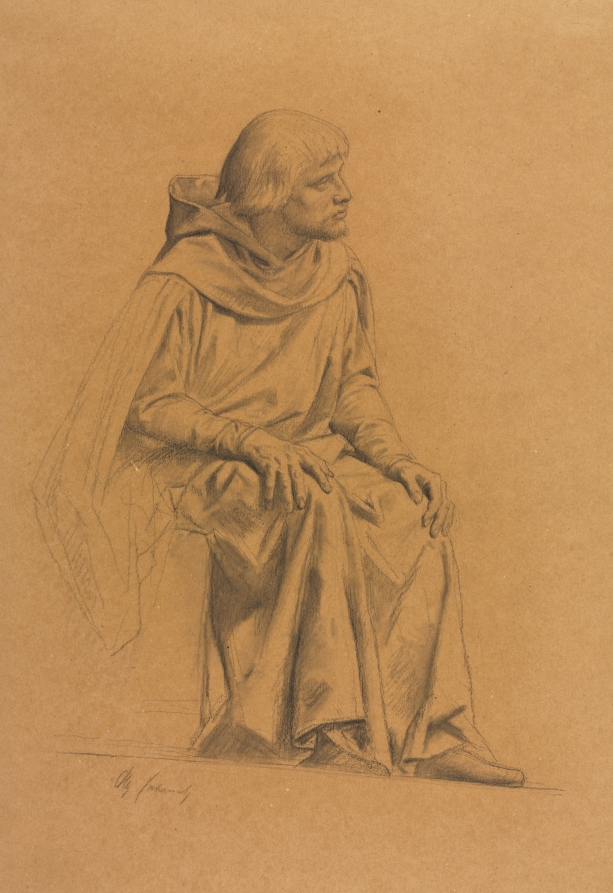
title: St. Louis pendant la Justice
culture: France, 19th century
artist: Alexandre Cabanel (French, 1823–1889)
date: c. 1875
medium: black chalk with stump work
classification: Drawing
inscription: Signed, lower left in black chalk: Ale Cabanel